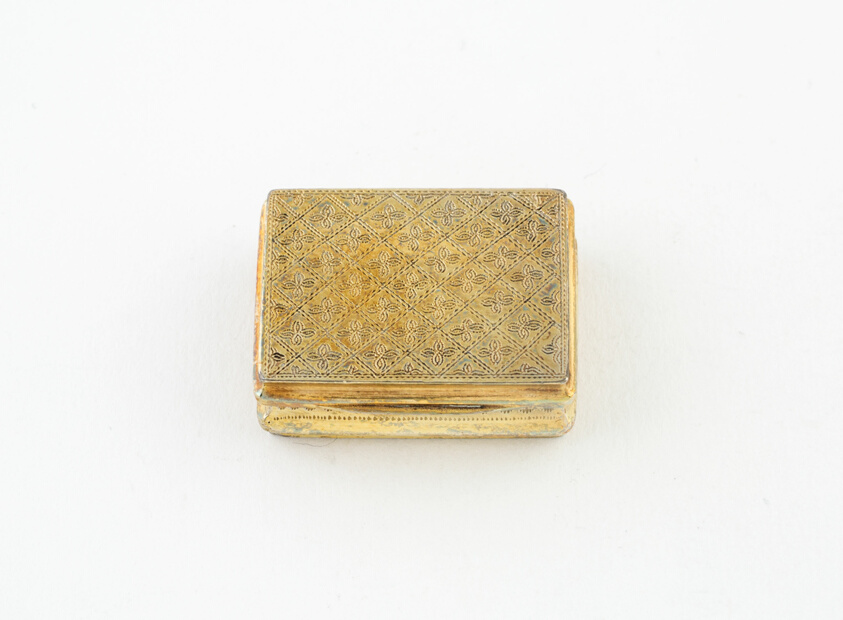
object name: Metalwork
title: Vinaigrette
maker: London, England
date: c. 1833/34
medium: Silver gilt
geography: London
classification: vinaigrette (container for health care); container for personal use; box; european decorative arts; metalwork; silver; decorative object/ornament